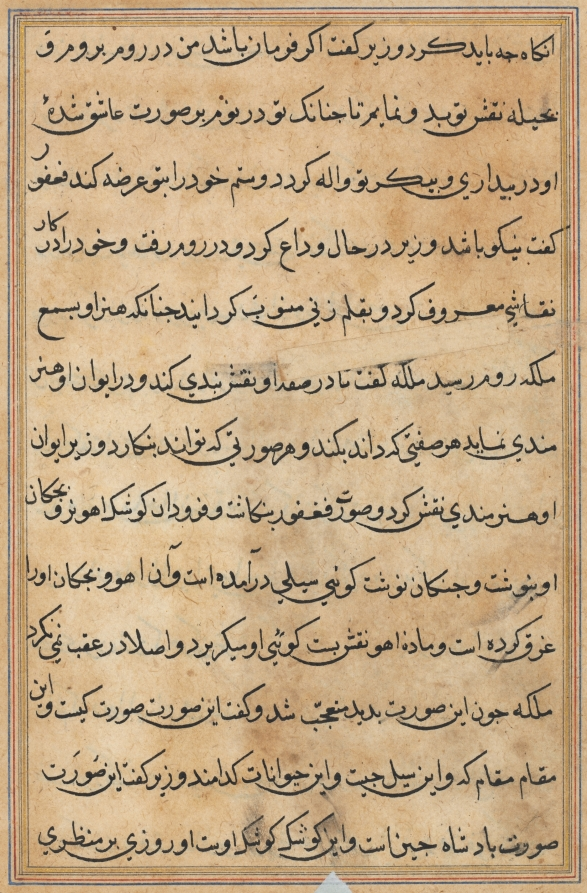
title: Page from Tales of a Parrot (Tuti-nama): text page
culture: Mughal India, court of Akbar (reigned 1556–1605)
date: c. 1560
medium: gum tempera, ink, and gold on paper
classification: Painting